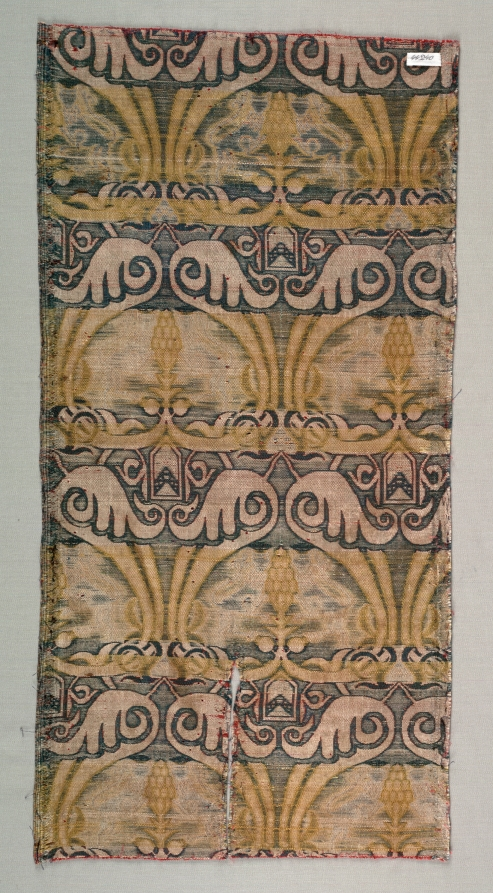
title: Fragment with crowned lions, palmettes, and escutcheons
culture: Spain, Granada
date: 1400s-1500s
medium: Silk: lampas weave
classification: Textile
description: Pairs of yellow lions are framed beneath arches formed by elaborate green leaves in a sumptuous repeated pattern. The city of Granada in southern Spain, where the Alhambra palace stood, continued to be a major center for silk production and commerce through the 1500s. Because the upside-down shields contain no Arabic inscriptions, it was probably made after the fall of the last Muslim sultan to the Christian King Ferdinand and Queen Isabella in 1492.